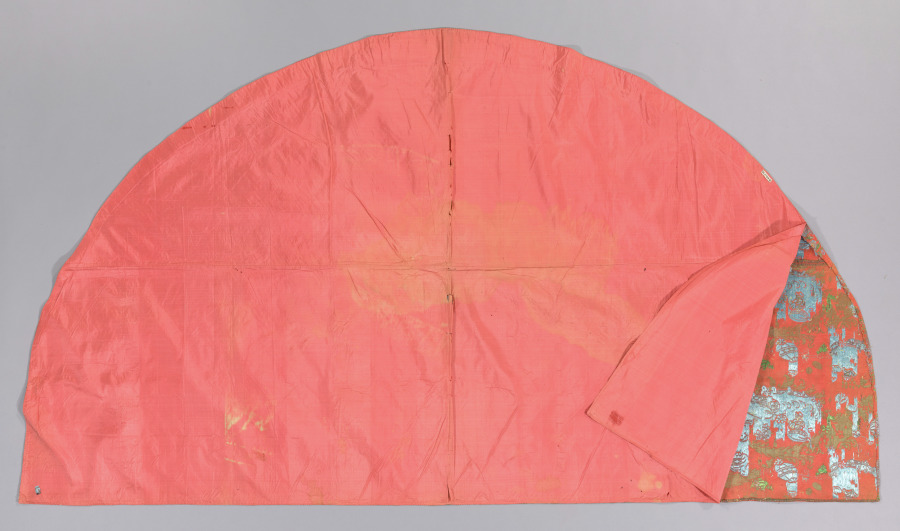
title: Fragment of a Cope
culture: Italy, Venice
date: 1700s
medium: brocade; silk and metal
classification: Textile